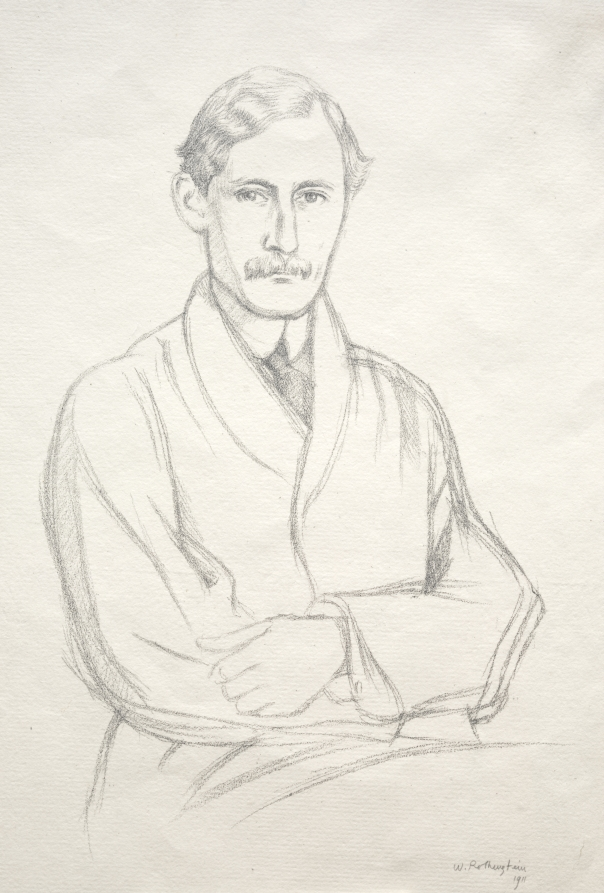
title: J. E. Spingarn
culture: England, 20th century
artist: William Rothenstein (British, 1872–1945)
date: 1911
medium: lithograph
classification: Print